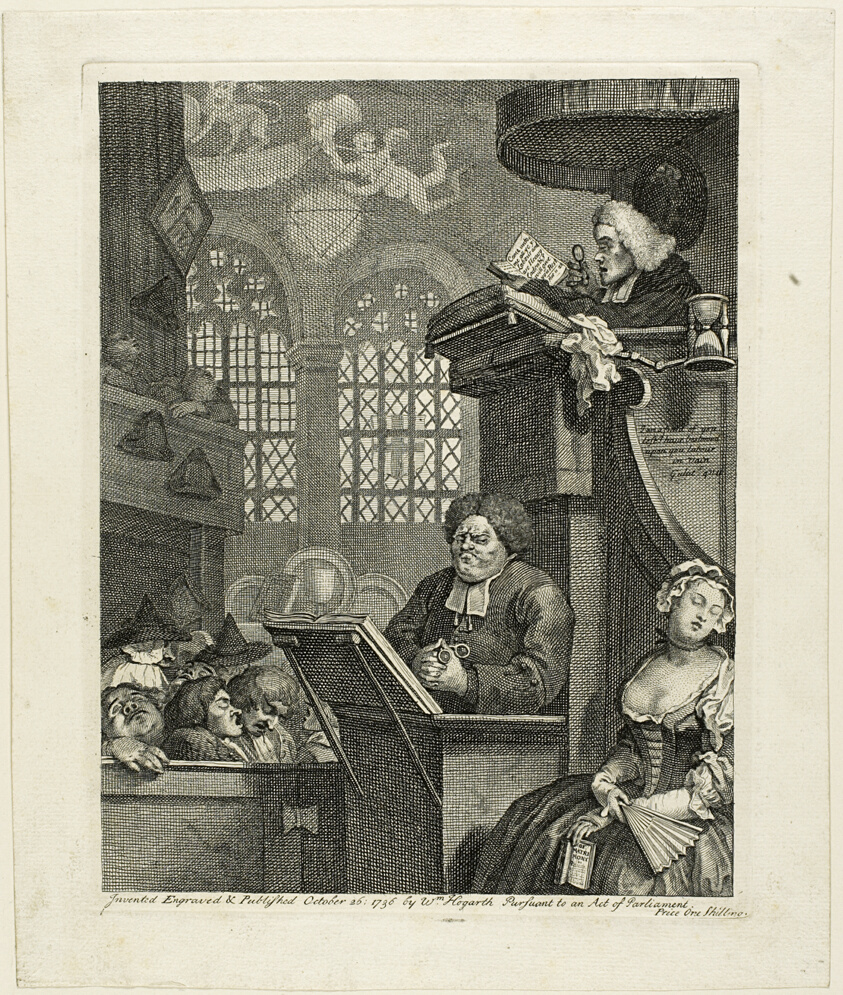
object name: Print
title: The Sleeping Congregation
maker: William Hogarth (English, 1697-1764)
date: October 1736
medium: Etching and engraving in black on ivory wove paper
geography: England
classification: etching; print; prints and drawing